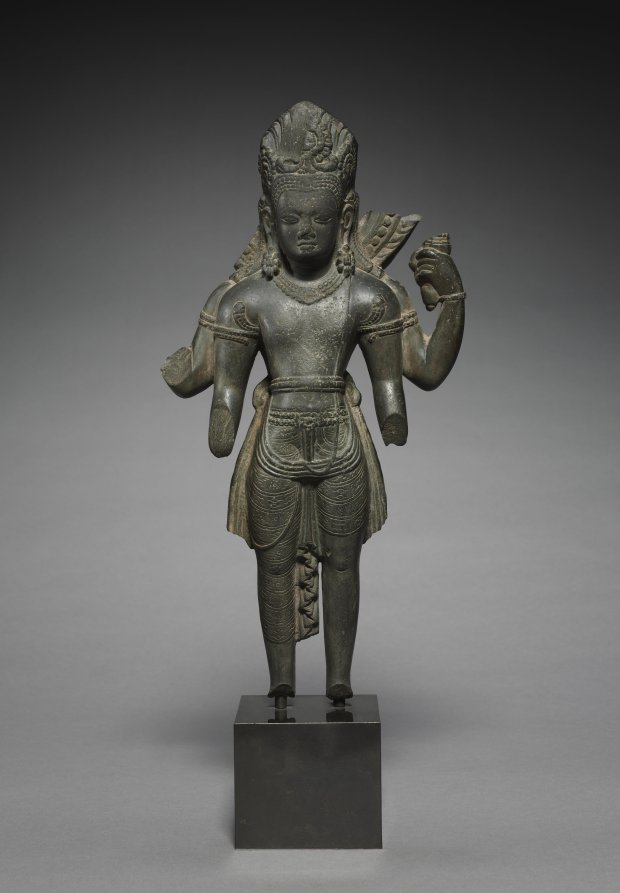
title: Vishnu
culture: Nepal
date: 800s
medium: schist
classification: Sculpture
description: The axial stance and somber expression visually amplify the powerful nature of this four-armed Hindu god. The crown and fine textiles communicate his regal qualities. In his upper left hand, a conch shell signals the start of battle or the sound of OM at the opening of a mantra recited to quell inner demons. Vishnu’s followers glorify his ability to destroy demonic forces that bring imbalance and disorder, both throughout the world and within oneself.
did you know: The dark stone was highly polished and once gleamed like bronze.